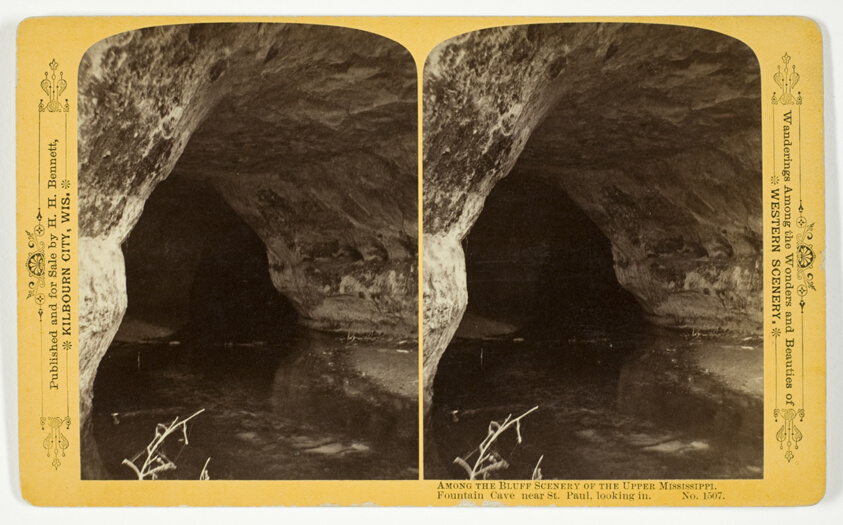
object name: Photograph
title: Fountain Cave near St. Paul, looking in, , No. 1507 from the series "Among the Bluff Scenery of the Upper Mississippi"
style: 19th century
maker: Henry Hamilton Bennett (American, born Canada, 1843-1908)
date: 1870/1908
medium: Albumen print, stereo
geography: Wisconsin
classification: photography; photograph; albumen silver print; stereograph (albumen)